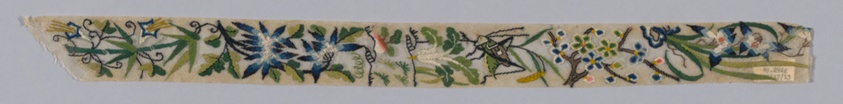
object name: Textile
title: Trimming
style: qing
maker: Han-Chinese (China)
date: Qing dynasty(1644–1911), 1850/1900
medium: White gauze, embroidered strips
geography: China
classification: weaving; textile